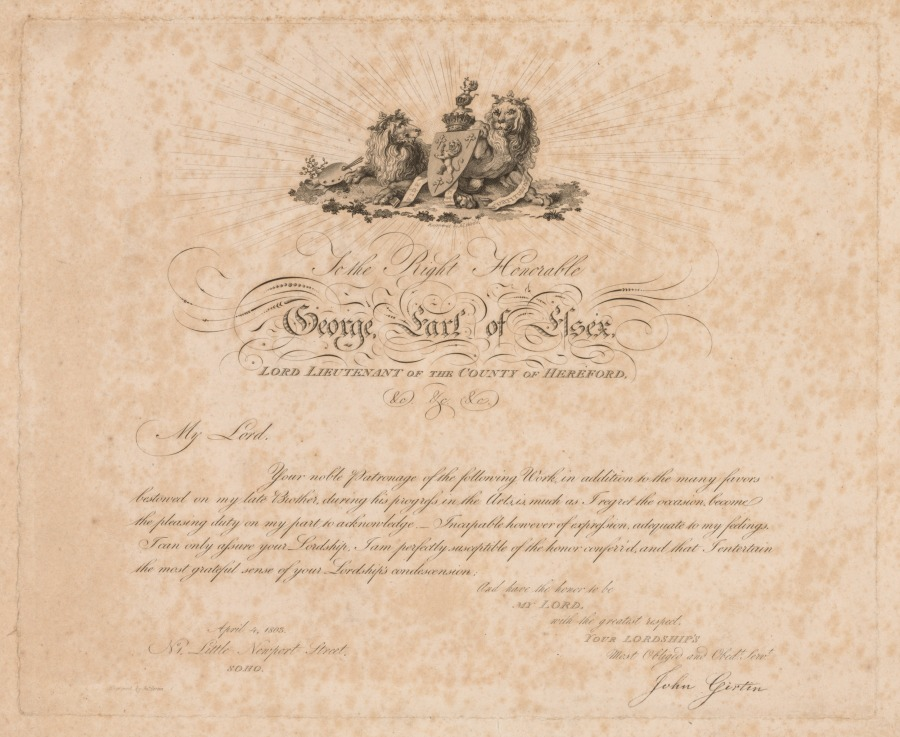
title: A Selection of Twenty of the Most Picturesque Views in Paris, and its Environs: Dedication Page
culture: England, 19th century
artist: John Girtin (British)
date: 1803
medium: engraving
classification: Print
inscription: Lower left: April 4, 1803 N. Little Newport Street / SOHO; lower right: And have the honor to be / my Lord, / with the greatest respect, YOUR LORDSHIP'S MOST OBLIGHTED and obedt. servt. John Girtin